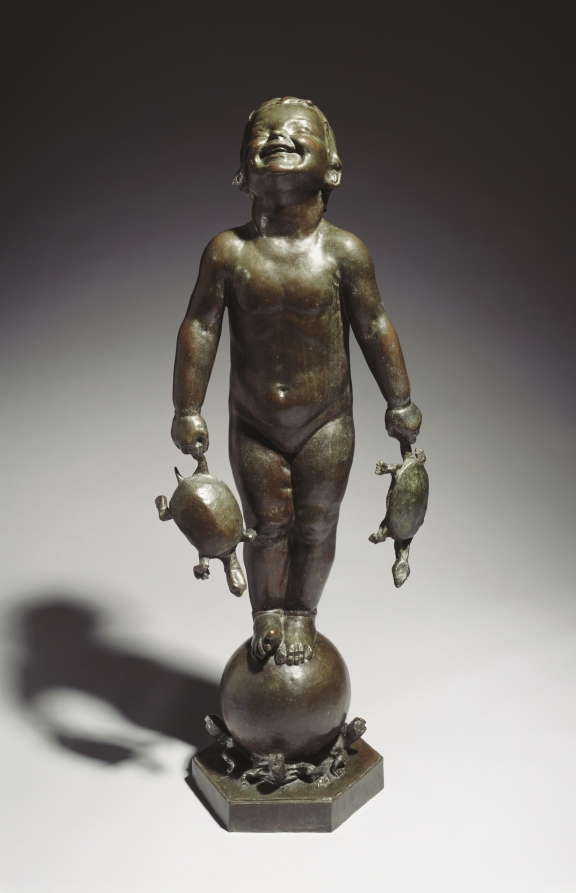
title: Turtle Baby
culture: America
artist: Edith Barretto Stevens Parsons (American, 1878–1956)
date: c. 1910–16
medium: bronze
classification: Sculpture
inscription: Signed on base: E. BARRETTO PARSONS COPYRIGHT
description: Parsons achieved renown through her garden sculptures of young children accompanied by animals, which one commentator praised for capturing “the happiness of just being alive.” In Turtle Baby, her most famous composition, the figure of the girl was modeled after her daughter. Conceived as a fountain, the sculpture has internal water conduits exiting the mouths of the four turtles circling its base.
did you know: Parsons created similar sculptures featuring young girls and boys with ducks, frogs, and fish.